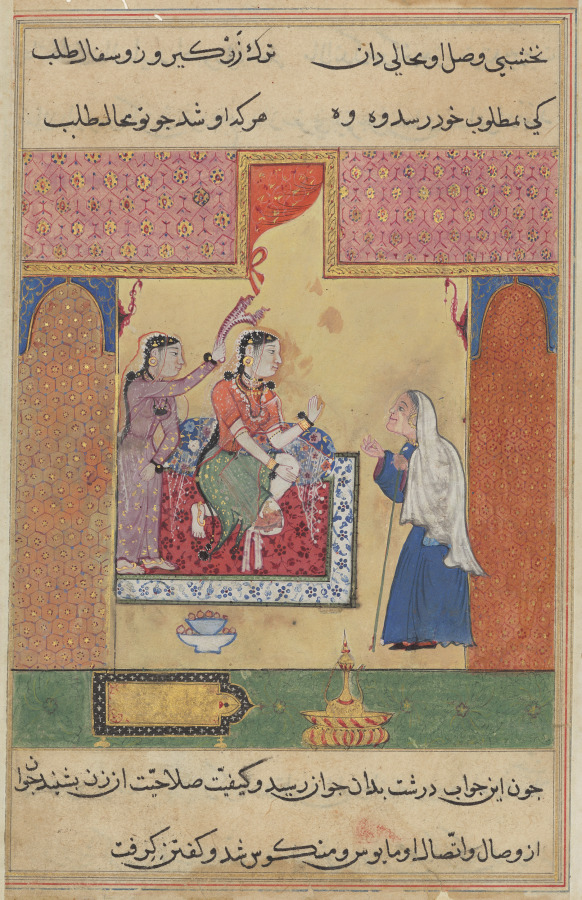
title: The old procuress conveys the young man’s message of love to Mansur’s wife, from a Tuti-nama (Tales of a Parrot: Seventeenth Night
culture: Mughal India, court of Akbar (reigned 1556–1605)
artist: Sravana (Indian)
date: c. 1560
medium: gum tempera, ink, and gold on paper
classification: Painting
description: When a lascivious young man learns of the beauty and virtue of the merchant Mansur’s wife, he becomes obsessed with her. While Mansur is away on a long journey, the man decides to profess his love for the woman through a messenger. Here Mansur’s wife, seated on an arabesque-patterned carpet, rebuffs the young man’s advances and sends the procuress away.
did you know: The golden mihrab next to vessels for ritual cleansing points toward Mecca, emphasizing the wife’s piety.